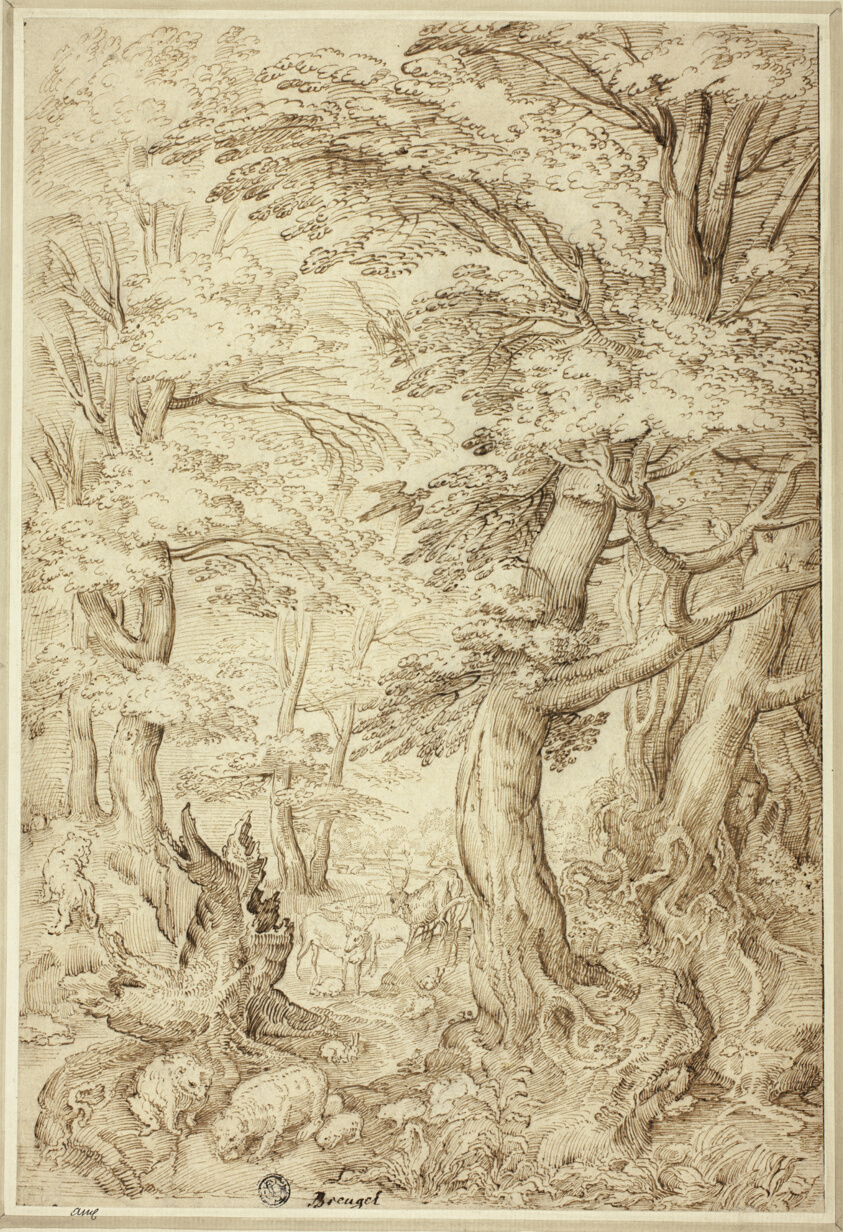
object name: Drawing and Watercolor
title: Forest Landscape with Wild Animals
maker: After Pieter Bruegel, the elder; Flemish, 1525/30-1569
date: late 16th century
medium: Pen and brown ink on buff laid paper, laid down on card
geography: Flanders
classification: pen and ink drawings; drawings (visual works); prints and drawing